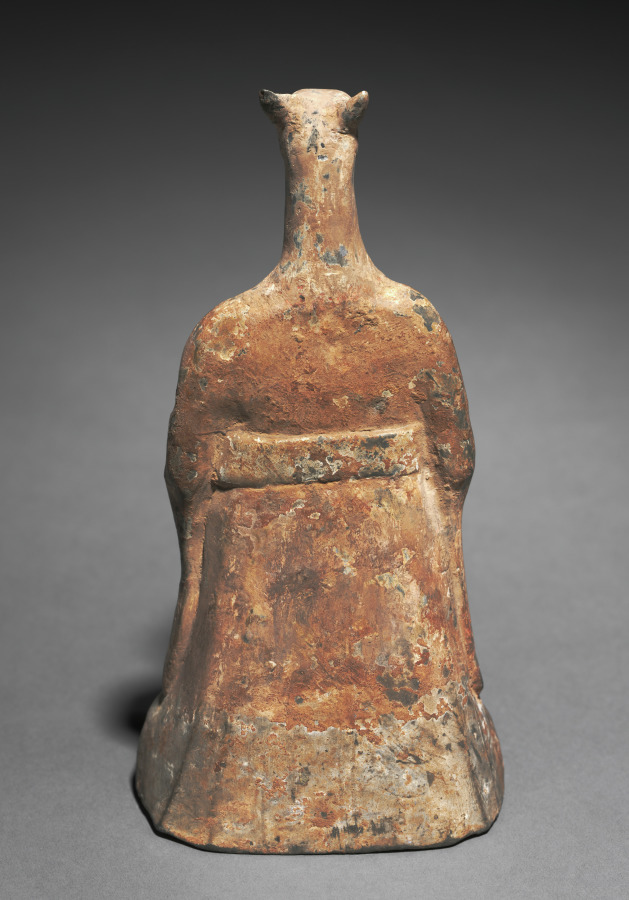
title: Mortuary Figure of the Zodiac Sign: Dog (Aquarius)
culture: China, Northern Wei dynasty (386-534)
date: 500s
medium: gray earthenware with traces of slip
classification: Sculpture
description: The twelve-animal zodiac series—rat, ox, tiger, rabbit, dragon, snake, horse, goat, monkey, rooster, dog, and boar—signifies a traditional Chinese concept of time structured in a cyclical order. The twelve animals are also linked to the art of fortune-telling that underlies human existence in connection with the changes of the universe. The use of the twelve zodiac animals as tomb furniture suggests they provided a cosmological structure for the afterlife.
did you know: This set of mortuary figures was donated by the first woman president of the Cleveland Museum of Art's board of trustees, Emery May Holden Norweb.